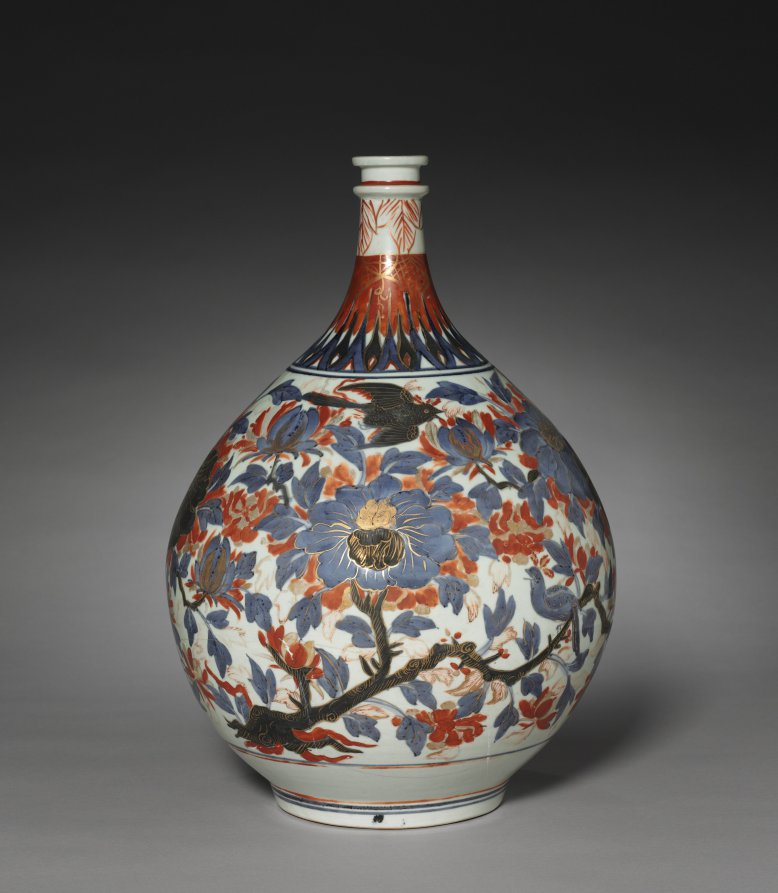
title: Apothecary's Bottle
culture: Japan, Edo period (1615–1868)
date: 1670s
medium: porcelain with underglaze blue and overglaze color enamels (Hizen ware, Arita type)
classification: Ceramic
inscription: on bottom: "IC" (probably stands for Joannes Camphuys, 1634-1695).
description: The decoration of this white porcelain bottle was achieved through a multistep process. First, some decorative elements, like the deep blue forms, were applied with glaze and then fired. Enamels were brushed on to achieve the bright colors. This bottle was probably in the collection of Johannes Camphuys (1634-1695), who was in charge of the Dutch residential island of Deshima in Nagasaki harbor.